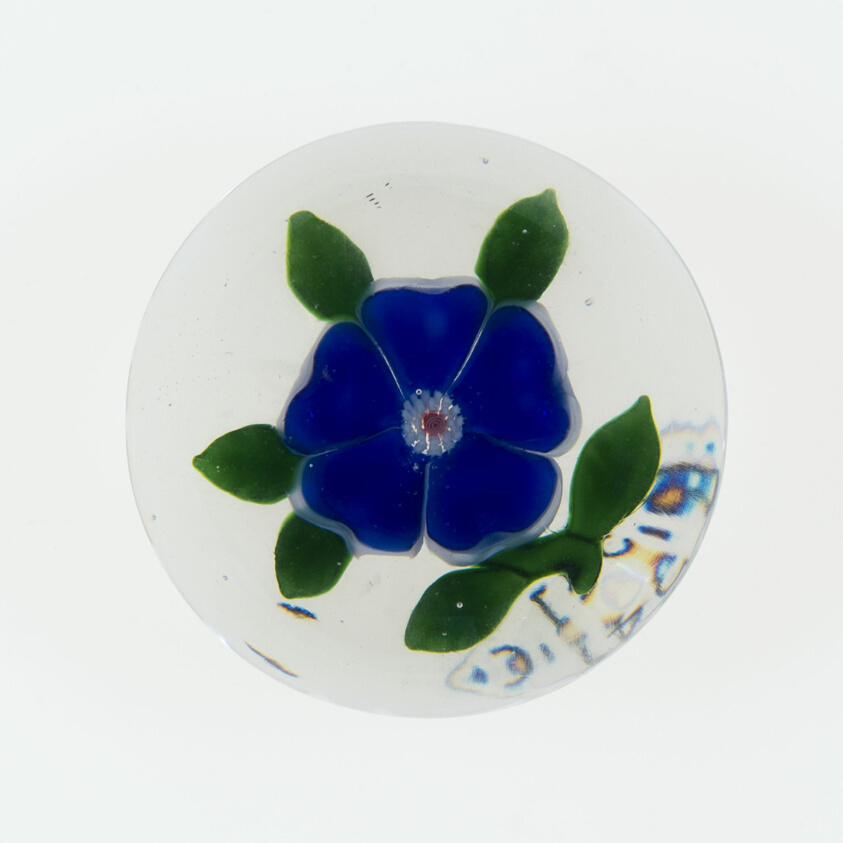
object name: Glass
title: Paperweight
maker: Baccarat Glassworks (Cristalleries de Baccarat); Lorraine, France, founded 1764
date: c. 1845–60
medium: Glass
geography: Baccarat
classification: paperweight; glass